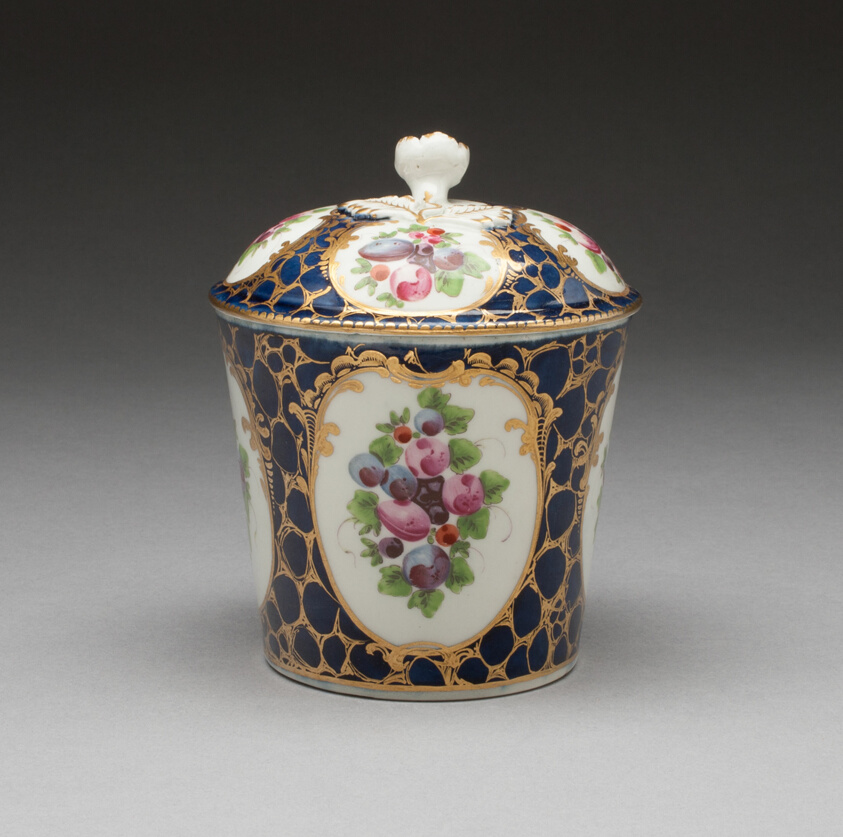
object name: Ceramics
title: Toilet Pot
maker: Worcester Porcelain Factory (Warmstry House Period, 1751–1783); Worcester, England, founded 1751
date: c. 1770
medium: Soft-paste porcelain with polychrome enamels and gilding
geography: Worcester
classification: ceramics; teaware; porcelain; european decorative arts